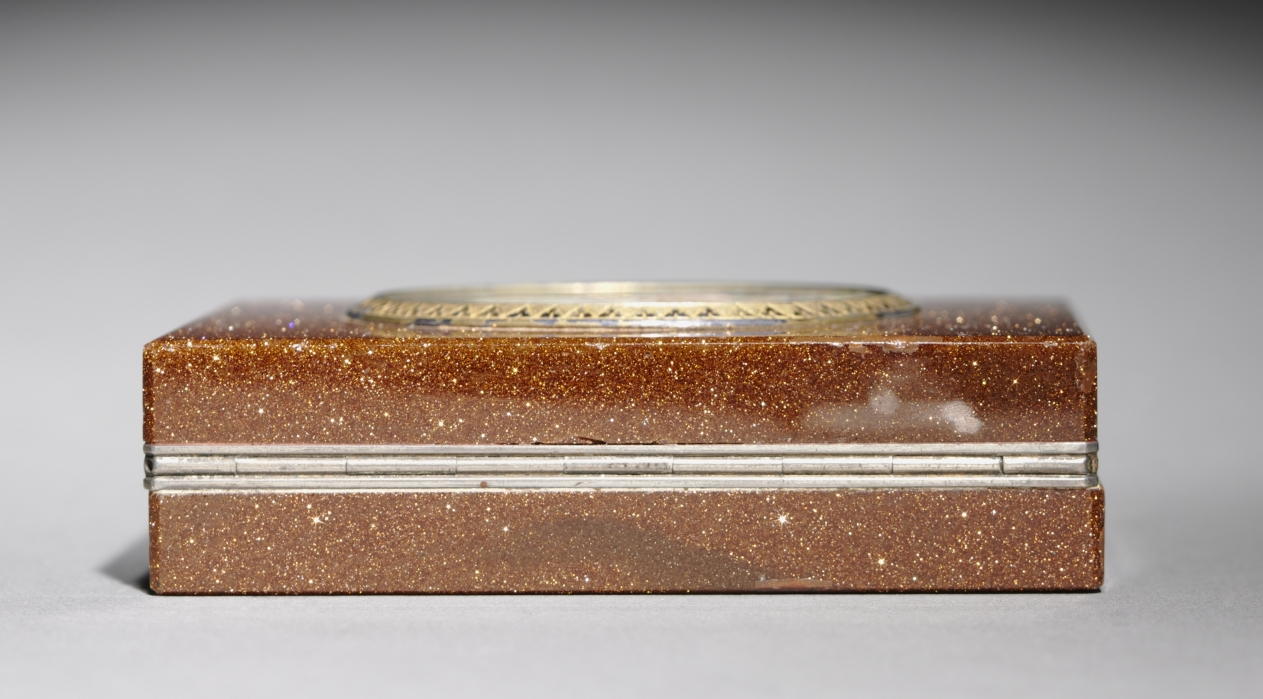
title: Snuff Box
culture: Italy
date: 1860–70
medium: goldstone, gold, micro mosaic glass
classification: Enamel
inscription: no marks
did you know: Hundreds of small glass tesserae make up the central image on the cover of this snuff box.